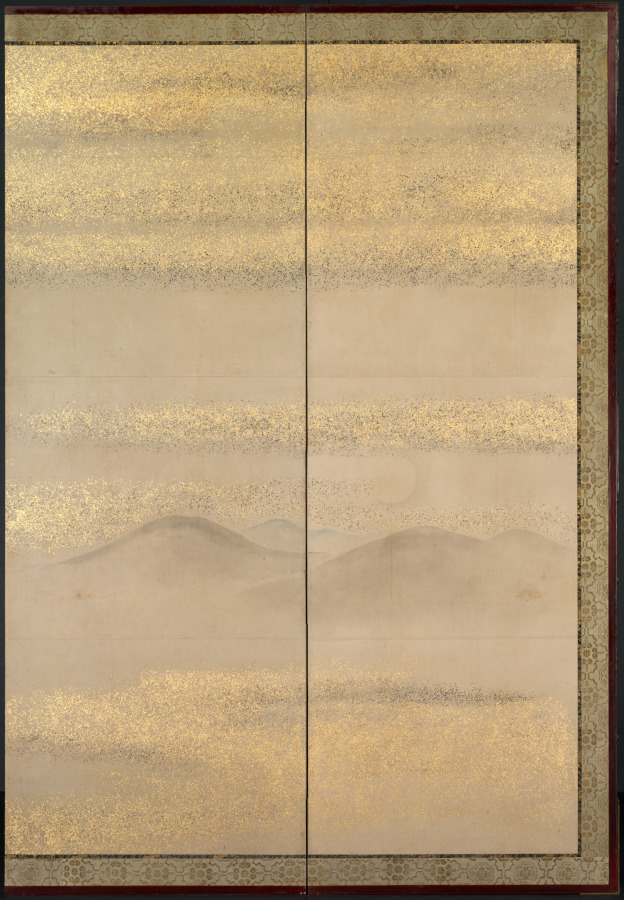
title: Summer and Winter Landscapes (one of a pair)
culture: Japan, Edo period (1615–1868)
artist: Kano Naonobu (Japanese, 1607–1650)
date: 1600s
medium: six-panel folding screen; ink on gold- and silver-decorated paper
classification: Painting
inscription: signed: "Jitekisai Naonobu"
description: This sparse composition depicts a summer scene on the right and a winter scene on the left. Careful observation reveals that the pair of screens was once damaged, and a later conservation including new sections of paper and inpainting sought to preserve the original flavor of the paintings so they could continue to be appreciated. Kano Naonobu was born in Kyoto, the younger brother of major painter and authenticator Kano Tan’yū (1602–1674). He relocated to Edo (present-day Tokyo) at the behest of the Tokugawa government in 1630 where he worked with his brother and teacher. In Kyoto, he helped his brother with paintings for Nijō Castle and the major Pure Land Buddhist temple Chion’in.